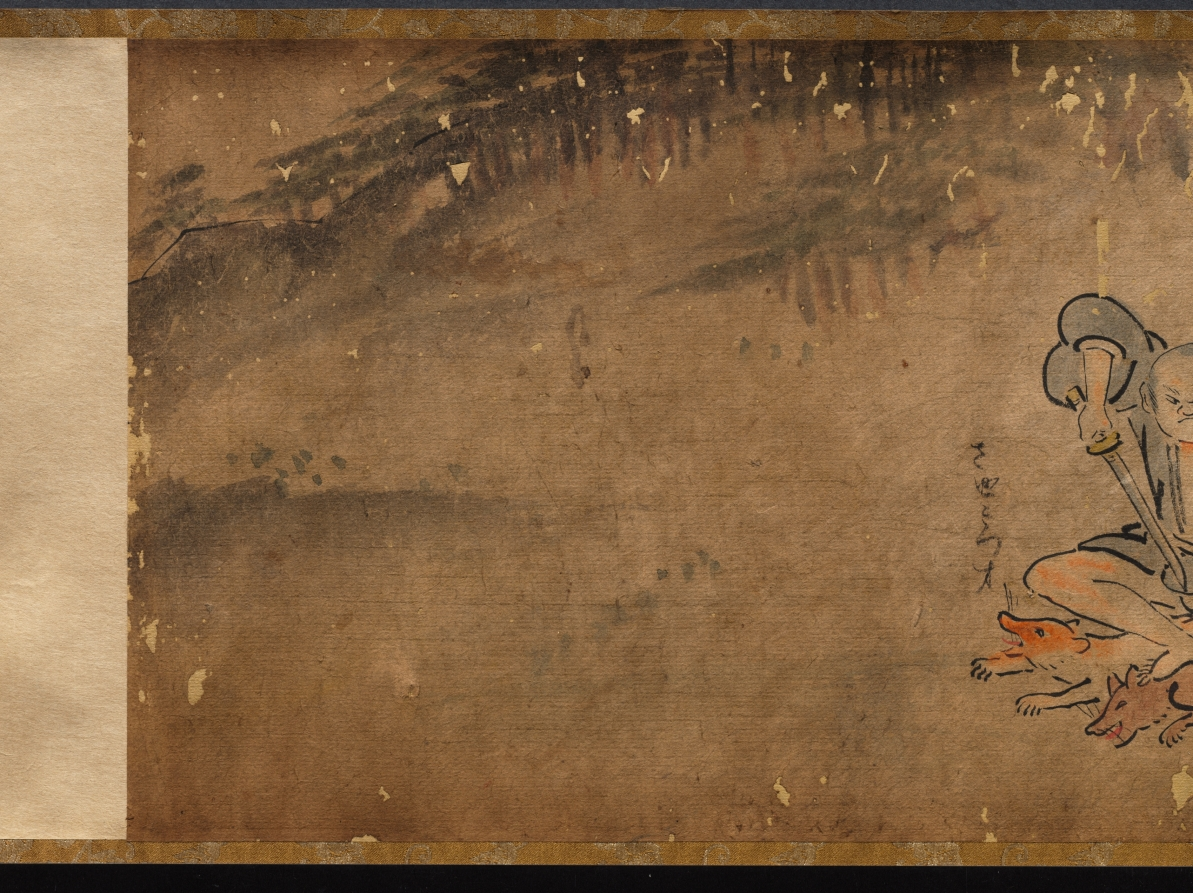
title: The Illustrated Tale of Oishi Hyōroku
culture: Japan, Edo period (1615–1868)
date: 1700s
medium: handscroll; ink and color on paper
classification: Painting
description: This incomplete handscroll illustrates part of the story of Oishi Hyoroku, a young man tasked with battling fox apparitions who were creating problems in his town. In other extant versions of the scroll, the story is set in the fall of 1624 in Kagoshima in southern Japan. Throughout the story, Hyoroku is tricked and terrified by the foxes that shift their shapes into a variety of monstrous phantoms. After repeated humiliations, he eventually captures two of the foxes. In this version, colloquial texts that function like text blurbs in comics appear throughout the scroll, but the main text is missing.